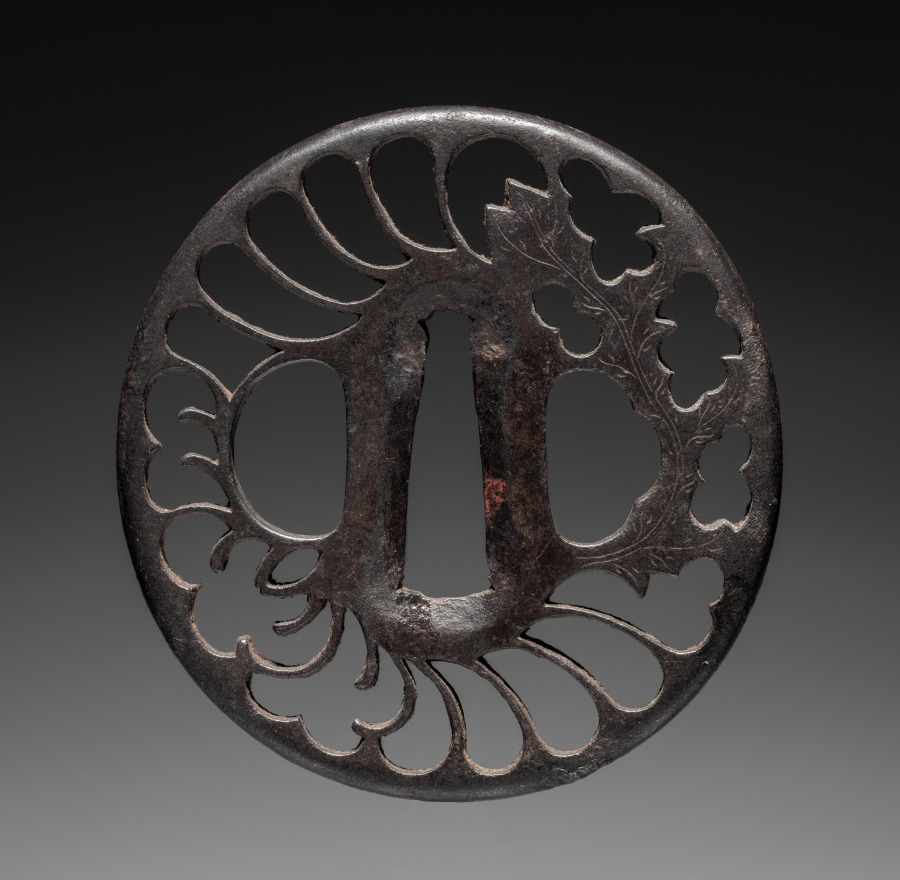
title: Sword Guard (Tsuba) with Chrysanthemum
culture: Japan, possibly Edo period (1615-1868)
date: c. 1615–1868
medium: iron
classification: Arms and Armor